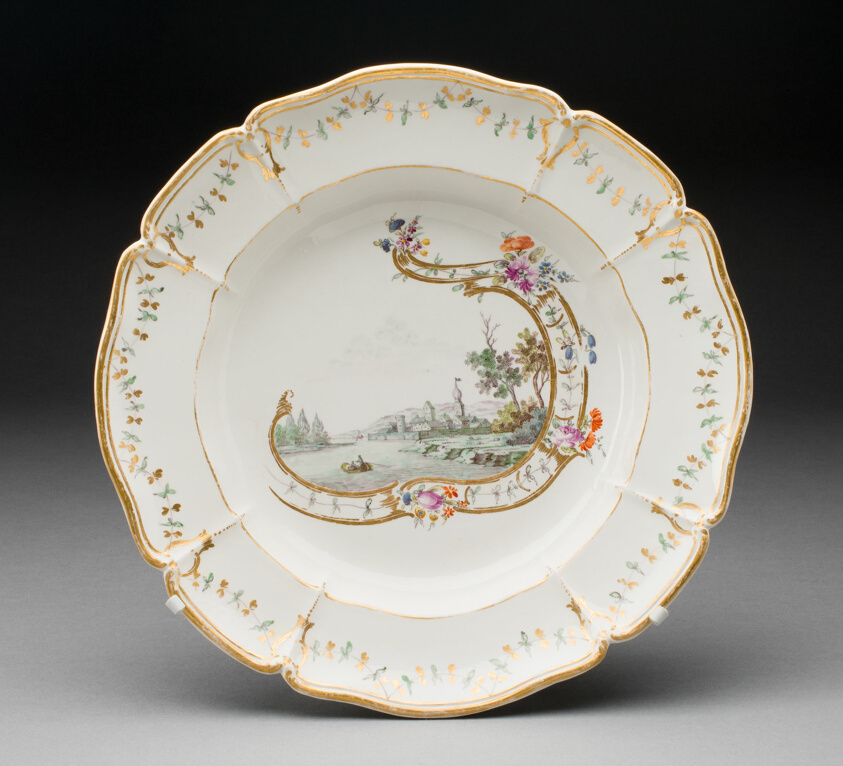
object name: Ceramics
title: Plate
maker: Germany, Nymphenburg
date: 18th century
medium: Hard-paste porcelain with polychrome enamels and gilding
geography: Germany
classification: plate (general, dish); tableware; dish (vessel); porcelain; european decorative arts; ceramics